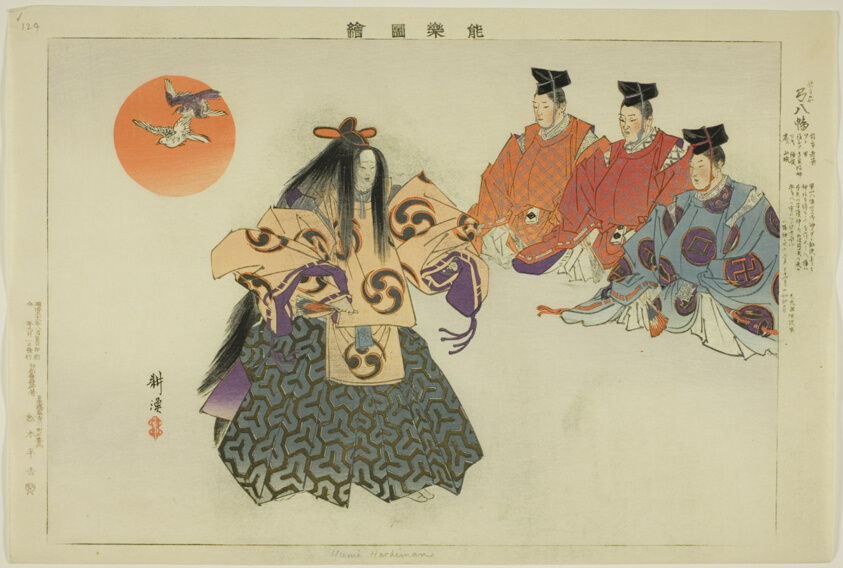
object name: Print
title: Yumi Hachiman, from the series "Pictures of No Performances (Nogaku Zue)"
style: Japanese (culture or style)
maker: Tsukioka Kogyo; Japanese, 1869-1927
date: 1898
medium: Color woodblock print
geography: Japan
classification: woodblock print; print; asian art